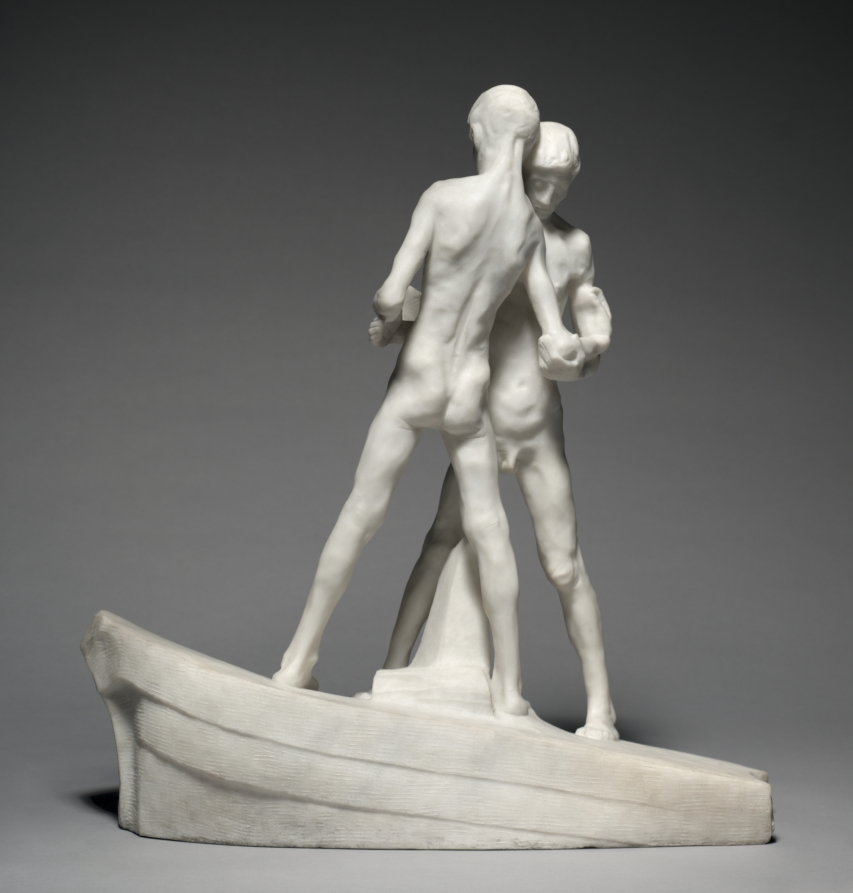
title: Solidarity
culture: Belgium, late 19th century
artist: George Minne (Belgian, 1866–1941)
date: 1898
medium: marble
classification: Sculpture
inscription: Signed near left foot of taller figure: "G. Minne"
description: In 1898, the Belgian Labor Party commissioned George Minne to make a memorial for Jean Volders, the Socialist movement leader. Rather than making a traditional portrait, Minne represented the socialist ideal of prioritizing cooperation over competition, creating an allegory of brotherhood with two nude men standing in a boat, anxiously trying to keep their balance in a storm. The Labor Party disliked Minne’s design and withdrew the commission. In anger, Minne destroyed his nearly 10-foot-tall plaster model, but the artist’s friends and contemporary critics recognized the power of the sculpture. A smaller study survived and was later cast in bronze. This marble version is the only carved example of the composition known to have been completed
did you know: Minnne’s sculpture explores spiritual life and inner conflict. His work focused on premodern themes and greatly influenced artists in Belgium, France, and Germany.